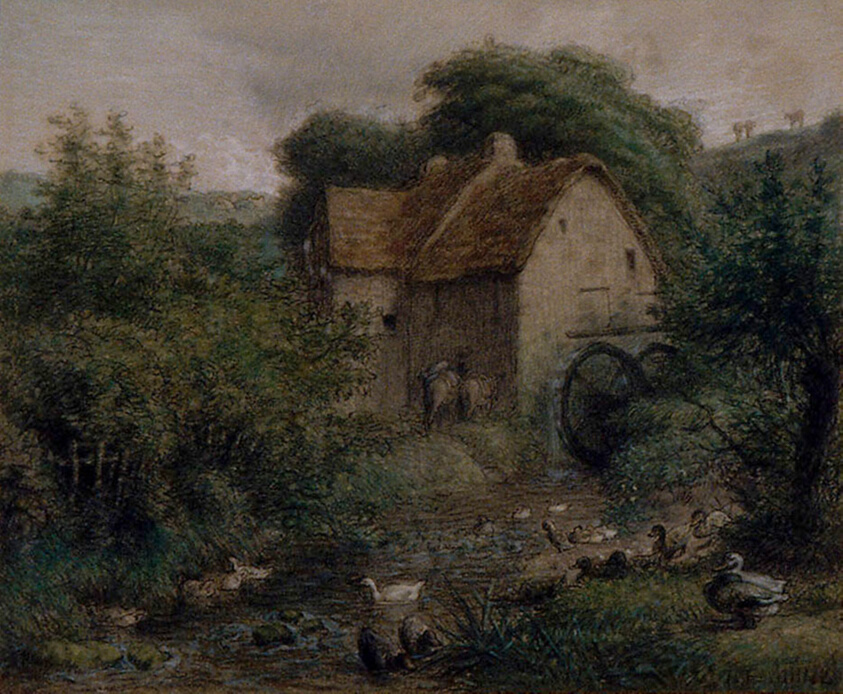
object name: Drawing and Watercolor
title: The Old Mill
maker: Jean François Millet (French, 1814-1875)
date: 1866/1870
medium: Pastel with stumping, pen and black ink, and touches of black chalk, on cream wove paper, laid down on wood pulp board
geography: France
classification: pastel; drawings (visual works); prints and drawing